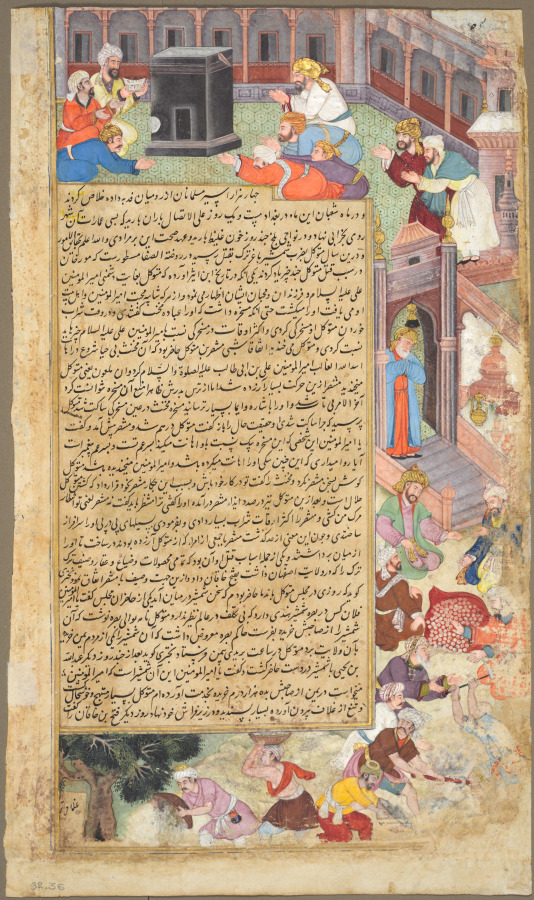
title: Page of disasters, from the Tarikh-i Alfi (History of the Thousand [Years])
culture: India, Mughal, 16th century, made for Akbar (reigned 1556–1605)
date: c. 1595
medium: Gum tempera, ink, and gold on paper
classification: Painting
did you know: Devastation after an earthquake includes a horse trapped under a fallen pavilion.